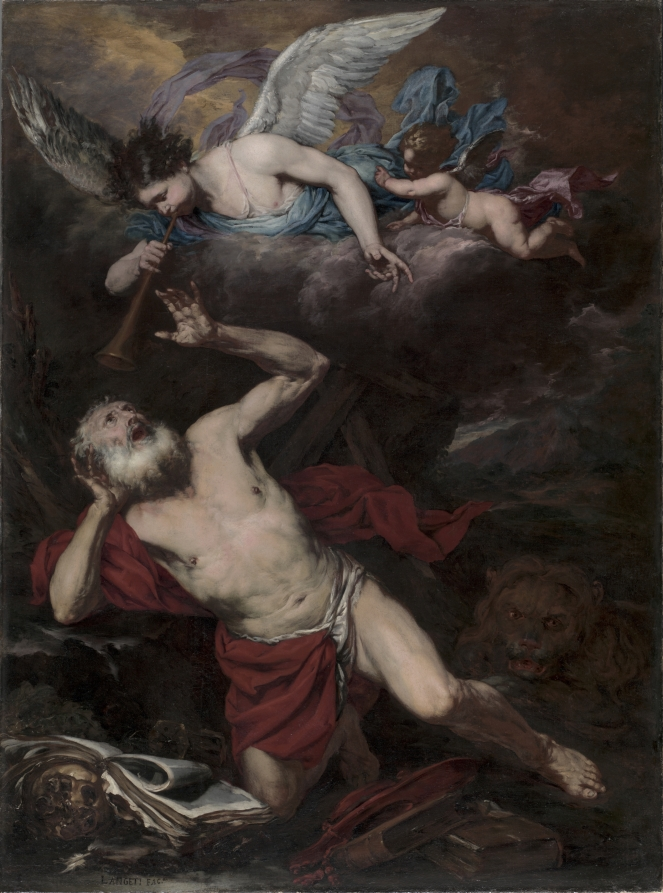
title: The Vision of Saint Jerome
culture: Italy, 17th century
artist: Giovanni Battista Langetti (Italian, 1635–1676)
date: c. 1660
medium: oil on canvas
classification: Painting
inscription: Signed lower left: "LANGETI FAC.at"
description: Jerome (c. AD 347–420) studied Greek and Latin literature in Rome, but eventually pursued theology, perceiving his conduct as corrupt and sinful. Around AD 374, Jerome had a vision of the Last Judgment in which an angel called him to task for his transgressions. Jerome then withdrew from society, learned Hebrew, and studied the Gospels, which led to his influential translations of the Bible. Langetti here follows a convention by depicting Jerome's vision after he retreated from the world. Working in the northern Italian port of Genoa, Langetti absorbed Caravaggio's impact, seen in the composition's naturalistic bodies and dramatic light.